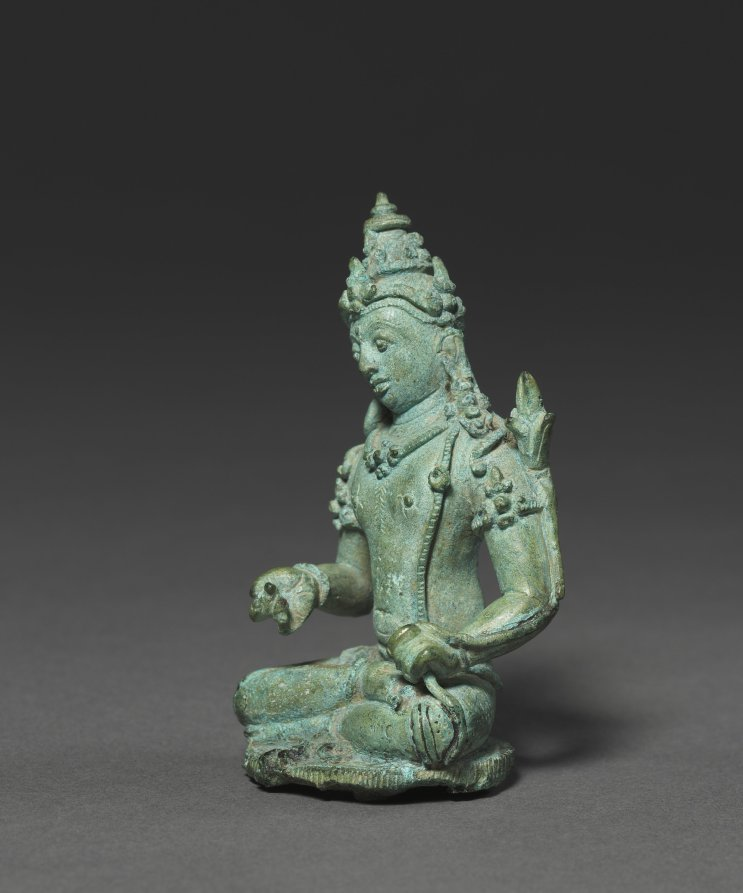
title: Bodhisattva Padmapani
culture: Java, predating Nganjuk style, 10th century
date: 900s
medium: bronze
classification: Sculpture